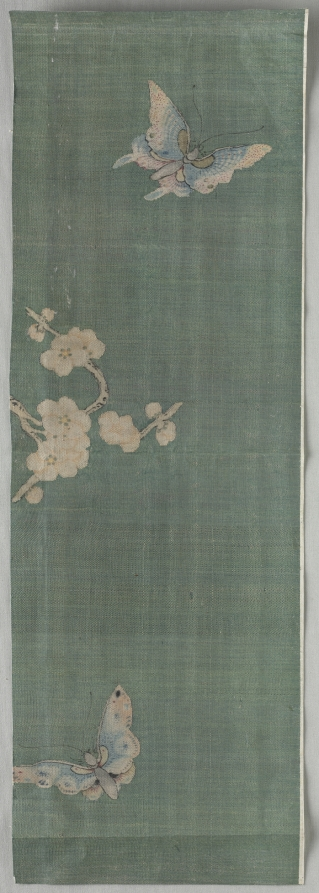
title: Textile Fragment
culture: Japan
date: 1800s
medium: tapestry; silk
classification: Textile